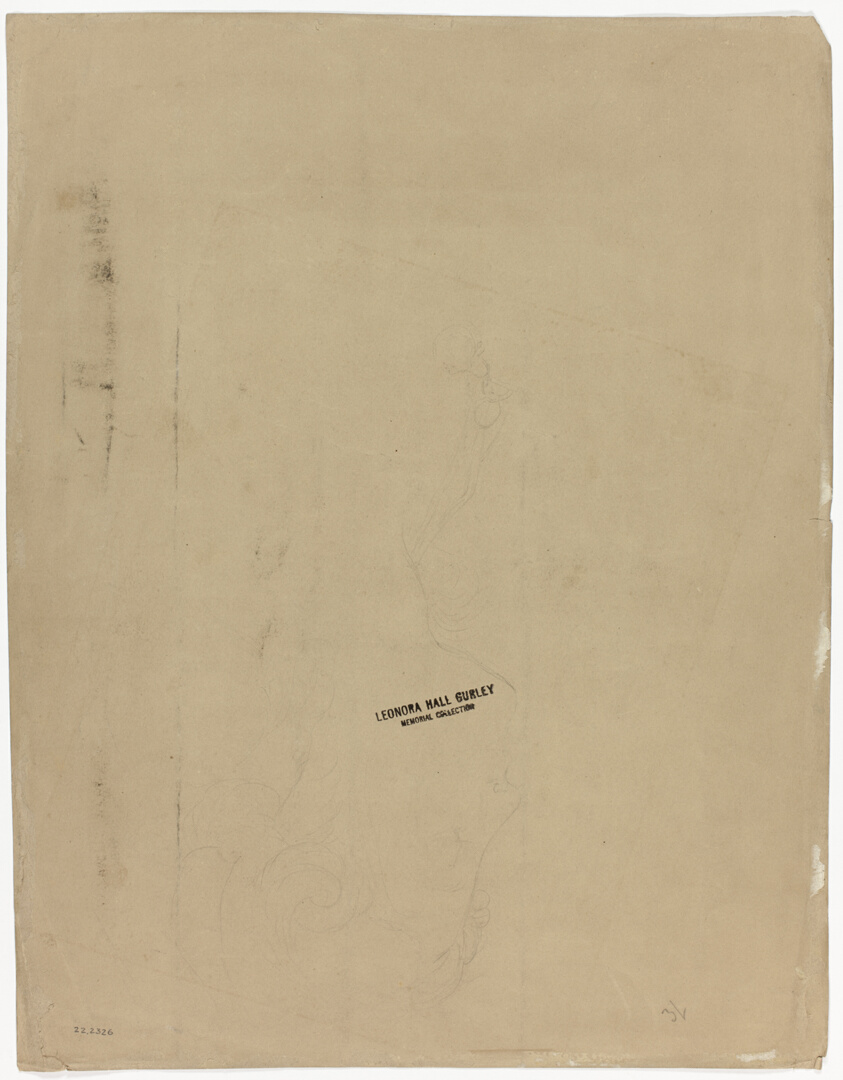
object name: Drawing and Watercolor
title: Girl Blowing on a Dandelion (recto); Profile Head of a Girl (verso)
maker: Unknown Artist; European, 19th century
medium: Black crayon, heightened with white chalk (recto), and graphite (verso), on tan wove paper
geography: Europe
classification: crayon; paper; drawings (visual works); prints and drawing